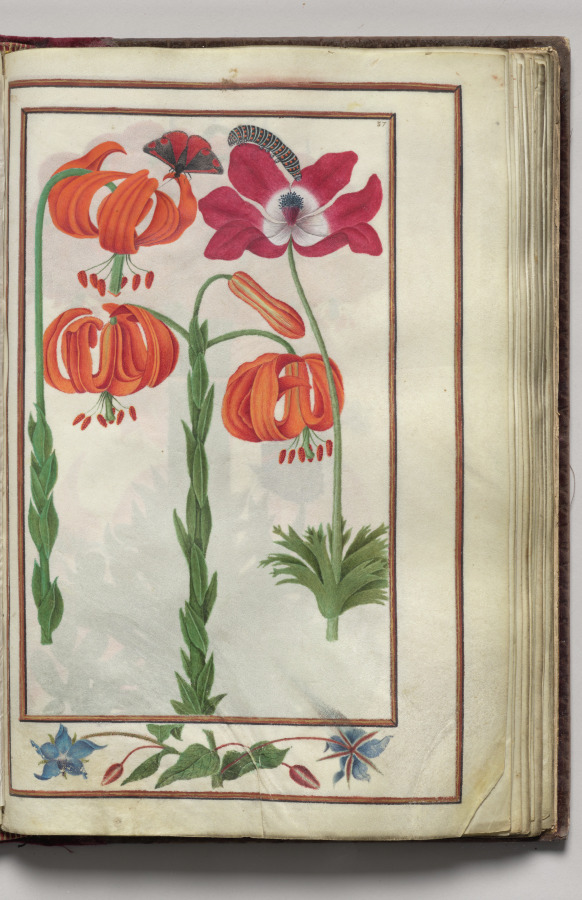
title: Lily, Anemone, Borage, and Caterpillar, with Floral Border, folio 19 (recto), from Florilegium (A Book of Flower Studies)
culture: France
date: 1608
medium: watercolor, ink, silver, and gold over occasional traces of pencil, on vellum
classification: Bound Volume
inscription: Dated: Poitiers 1608 (on frontispiece) Signed: On frontispiece in black ink, lower right: Van Kuyk Notation on drawing: Frontispiece: in pencil, lower margin: * élève de Van Kessel, peintre flammand (* in pencil also appears in front of Van Kuyk's name).